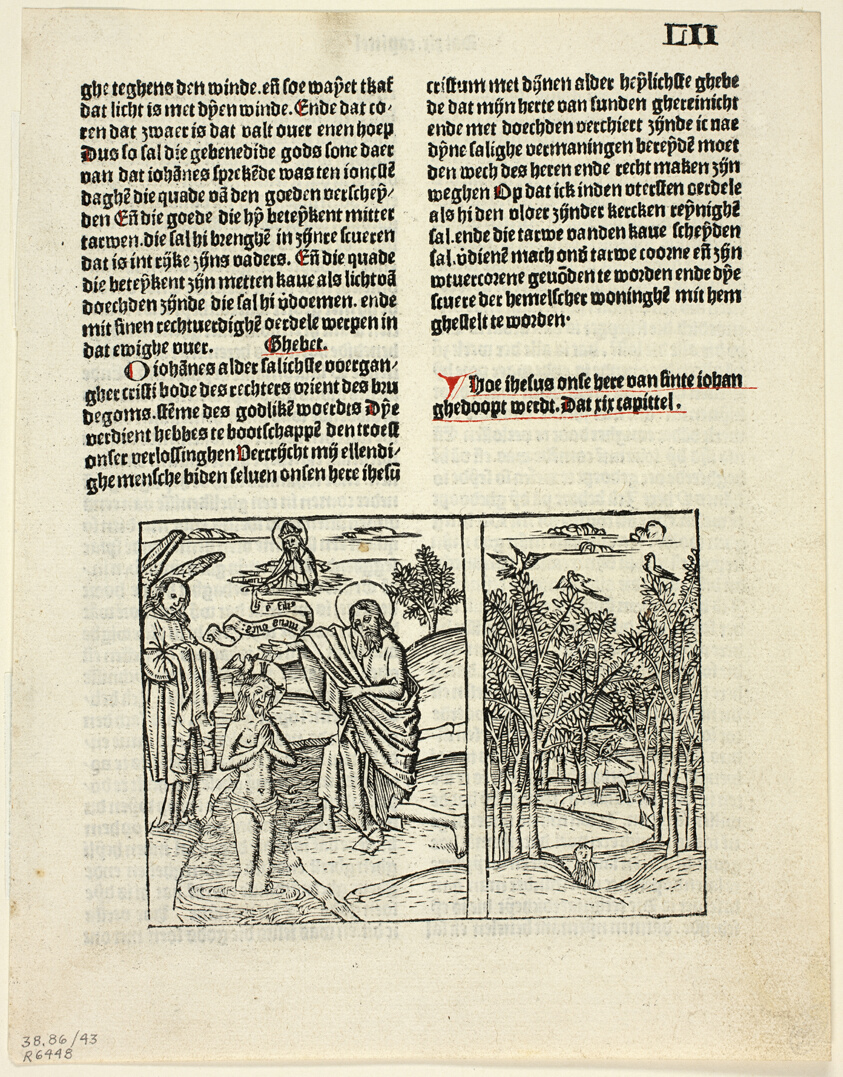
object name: Print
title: The Baptism of Christ and Forest Scene from Leven Christi (Life of Christ), Plate 43 from Woodcuts from Books of the 15th Century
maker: Unknown Artist (Gouda or Antwerp, late 15th century); printed and published by Pieter van Os (Netherlandish, active c. 1479-1496); original text by Ludolphus de Saxonia (German, c. 1295–1378); portfolio text by Wilhelm Ludwig Schreiber (German, 1855–1932)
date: 1495, portfolio assembled 1929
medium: Woodcut in black, and letterpress in black with rubrication (recto and verso), on cream laid paper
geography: Netherlands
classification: woodcut; print; prints and drawing